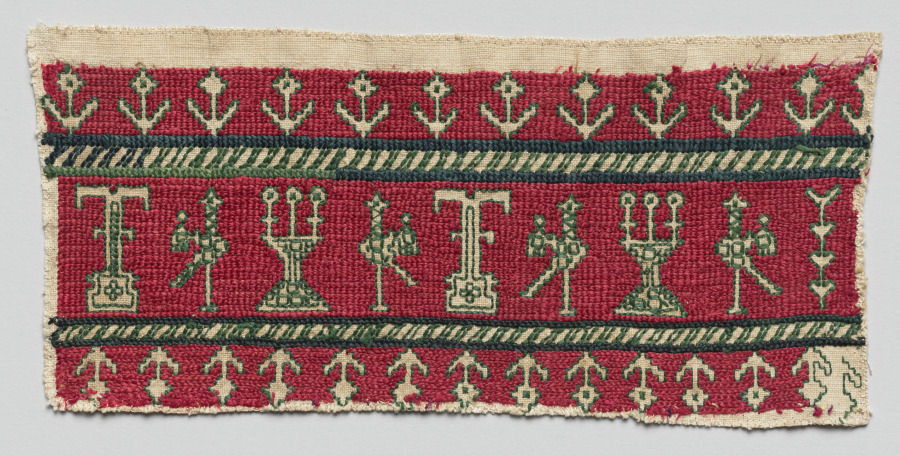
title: Fragment of a furnishing textile (one of five)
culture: Africa, North Africa, Morocco, Azemmour, Moroccan embroiderer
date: 1700s–1800s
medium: Linen, silk, dye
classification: Embroidery